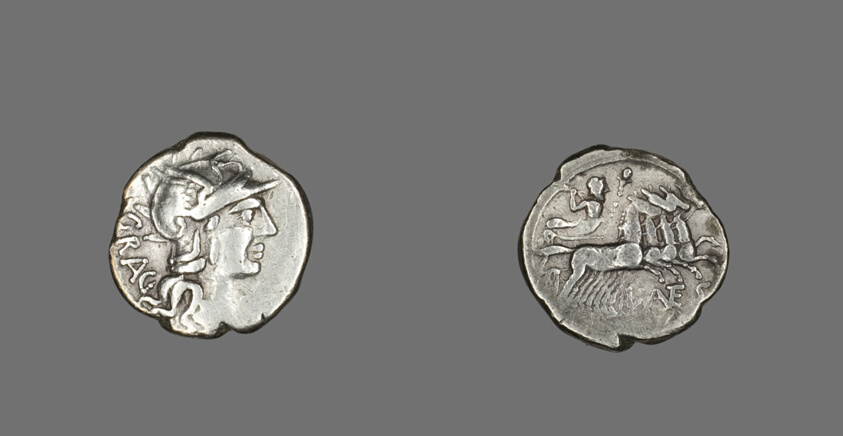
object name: Coin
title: Denarius (Coin) Depicting the Goddess Roma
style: republic period, ancient, roman (ancient, style or period)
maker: Roman, minted in Rome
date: 136 BCE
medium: Silver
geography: Italy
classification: coin; ancient art; struck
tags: goddesses, gods (deities), Chariots